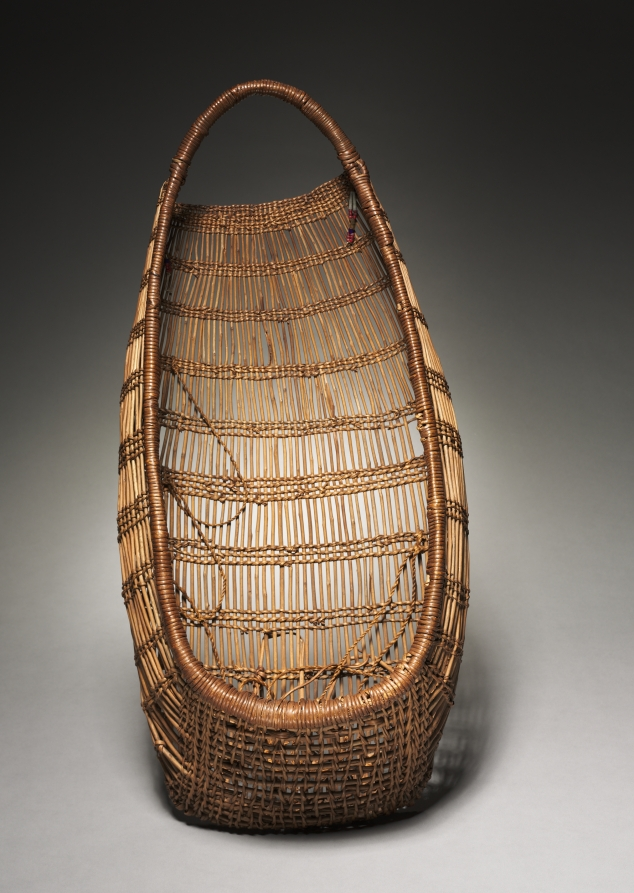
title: Cradle Basket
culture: California, Yurok or Hupa, Late 19th century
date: c 1875– 1910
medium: twined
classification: Basketry